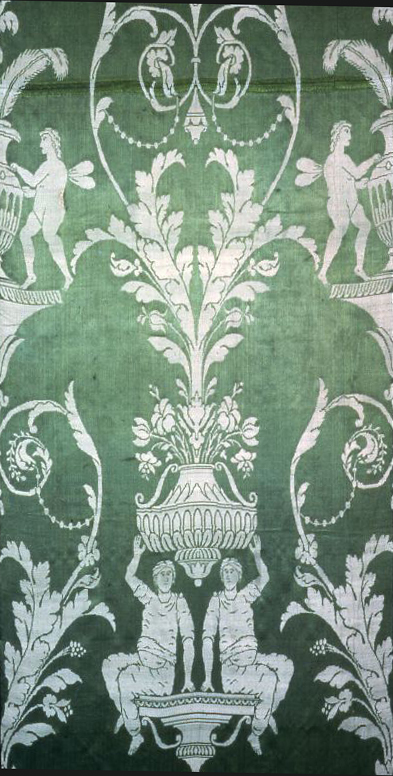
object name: Textile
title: Panel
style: empire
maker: France, Lyon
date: Empire period, c. 1810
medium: Silk, satin weave with plain interlacings of secondary binding warps and patterning wefts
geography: France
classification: textile; weaving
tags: people, circles